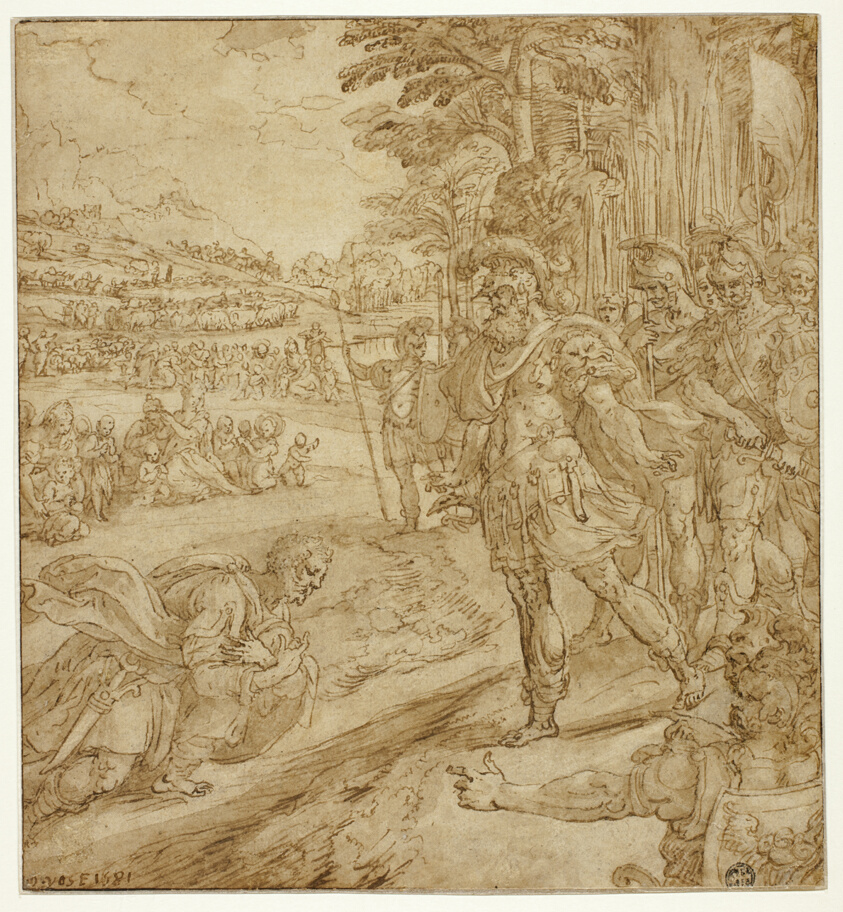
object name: Drawing and Watercolor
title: The Reconciliation of Jacob and Esau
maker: Maerten de Vos; Flemish, 1532–1603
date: 1581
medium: Pen and brown ink and brush and brown wash on cream laid paper, incised with a stylus for transfer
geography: Flanders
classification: pen and ink drawings; prints and drawing; paper